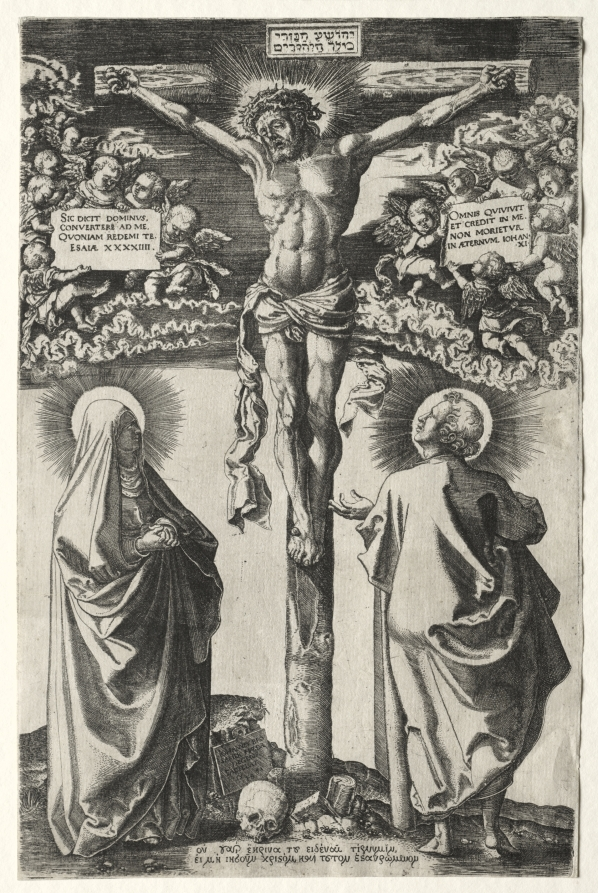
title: Christ on the cross between the virgin and St. John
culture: Germany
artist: Hans Brosamer (German, c. 1500–1554)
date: 1542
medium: engraving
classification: Print